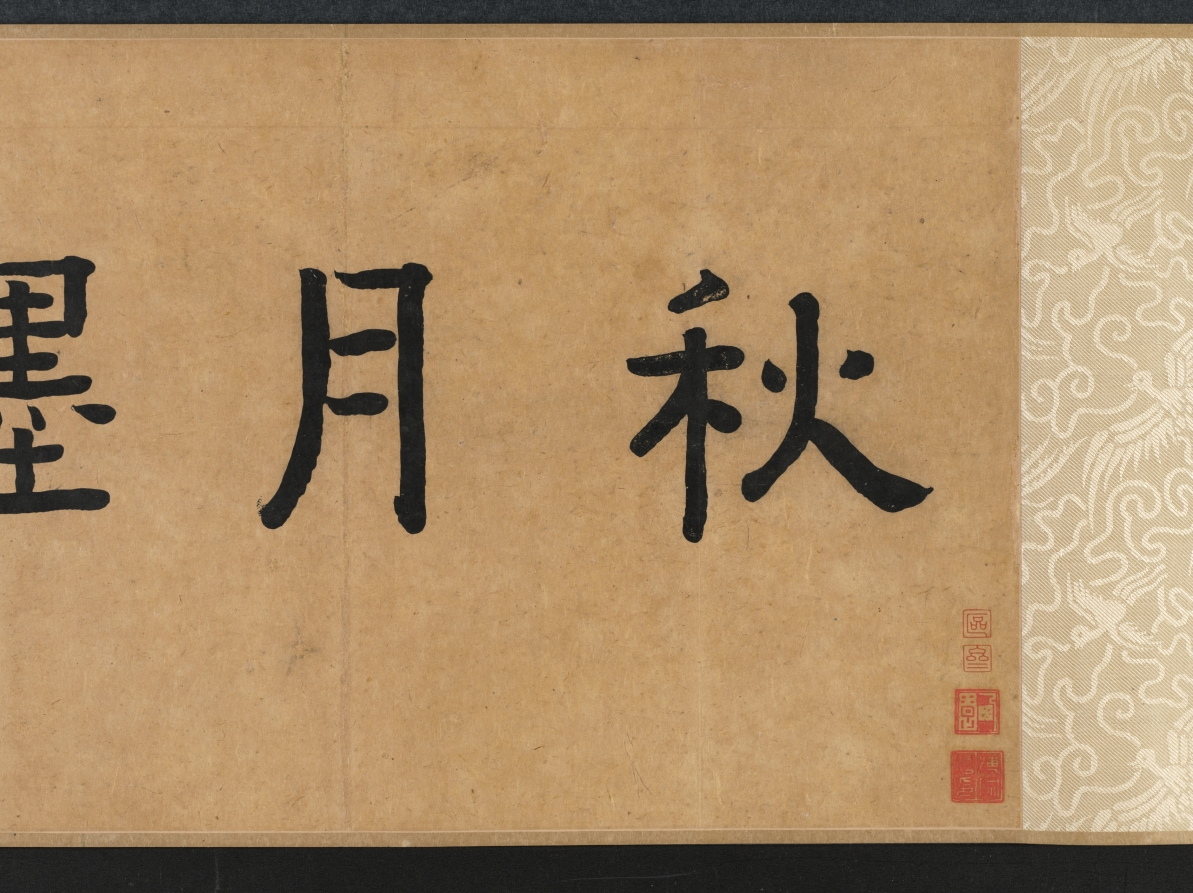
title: The Lantern Night Excursion of Zhong Kui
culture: China, Yuan dynasty (1271-1368)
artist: Yan Hui (Chinese, active 1270–1310)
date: late 1200s–early 1300s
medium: handscroll; ink and slight color on silk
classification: Painting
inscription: Artist's signature [and probable seal]: Yan Qiuyue 顏秋月 Title on frontispiece and 1 seal of Niu Shuyu 鈕樹玉 (1760–1827): Qiuyue mohuan 秋月墨幻 [Qiuyue's Ink Fantasy]. 31 additional seals: 2 of Yang Shiqi 楊士奇 (1365–1444); 2 of An Guo 安國 (1481–1534); 8 of Xiang Yuanbian 項元汴 (1525–1590); 2 of Geng Zhaozhong 耿昭忠 (1640–1686); 4 of Pu Tung 溥侗 (1870–1952); 7 of Tan Jing 譚敬 (1911–1991); 1 of Liu Ting-chih (20th c.); 5 unidentified.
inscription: An inscription by Zizhi Shanren 紫芝山人 [probably Jiang Hui 蔣惠], dated 1389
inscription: An inscription by Wu Kuan 吳寬 (1436–1504)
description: Here, the demon queller Zhong Kui leads a nightly procession of street entertainers with bare, muscular bodies and demonic faces. Some wear shabby clothes, and all perform stunts and tricks to astound and scare the viewer. In fact, a New Year custom in cities of southeast China had the poor, disguised as demons, process through the streets and play their tricks to clear households of evil spirits and welcome the spring. From right to left, a demonic figure leads the procession and beats a drum; another lifts a large rock; one stands on his hands trying to drink; one balances a jar on his elbow; three hold and wield weapons; one carries a folded chair covered by a cow’s skin; another holds Zhong Kui’s qin (zither), books, brush, and inkstone. At the end of the scroll, two figures offer a cup and bottle of wine to Zhong Kui, who lifts his hand in command.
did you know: Zhong Kui was an ancient ghostbuster.